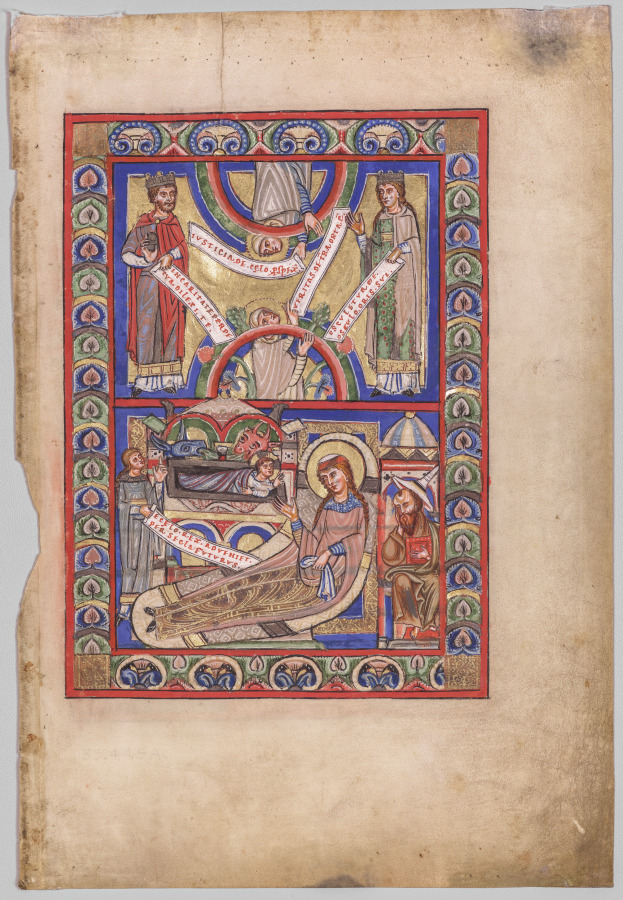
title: Single Leaf Excised from a Gospel Book: The Nativity (recto)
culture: Germany, Helmarshausen Abbey, 12th century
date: c. 1190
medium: ink, tempera, silver, and gold on vellum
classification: Manuscript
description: This leaf comes from a volume that is preserved in the Trier Cathedral Library in Germany (Codex 142).